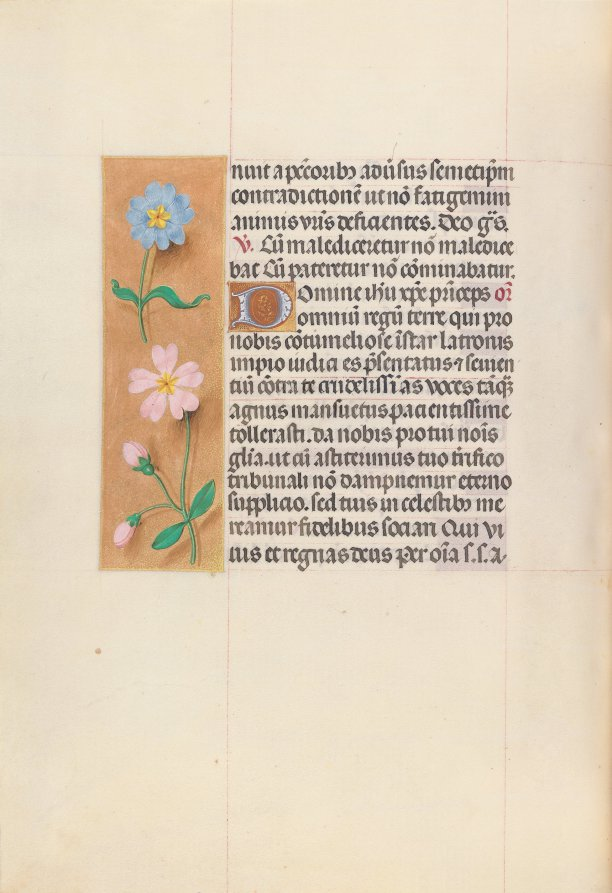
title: Hours of Queen Isabella the Catholic, Queen of Spain: Fol. 62v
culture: Flanders, Ghent and Bruges, late 15th century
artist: Master of the First Prayerbook of Maximillian (Flemish, c. 1444–1519)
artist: and Associates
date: c. 1500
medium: ink, tempera, and gold on vellum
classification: Bound Volume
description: This manuscript was illuminated by a circle of at least five highly organized manuscript painters active in the Flemish cities of Ghent and Bruges. The principal illuminator was Alexander Bening, who painted the majority of the book's miniatures. Manuscripts produced by this circle of artists are renowned for the decoration of their borders, which typically feature a rich variety of realistically-painted flowers, birds, and butterflies. This prayer book, called a book of hours, was intended not for a cleric, but for the private devotions of a lay person-in this case, Isabella the Catholic, Queen of Spain (1451-1504). Isabella's coat of arms embellishes the book's frontispiece. It is unlikely that the book was commissioned by the Queen herself; rather, she probably received it as a diplomatic gift from someone courting her patronage, perhaps Cardinal Francisco Jimenez de Cisneros. A Franciscan friar, Jimenez was dependent upon Isabella for his advancement, first to the post of Queen's confessor in 1492, and then to Archbishop of Toledo in 1495.